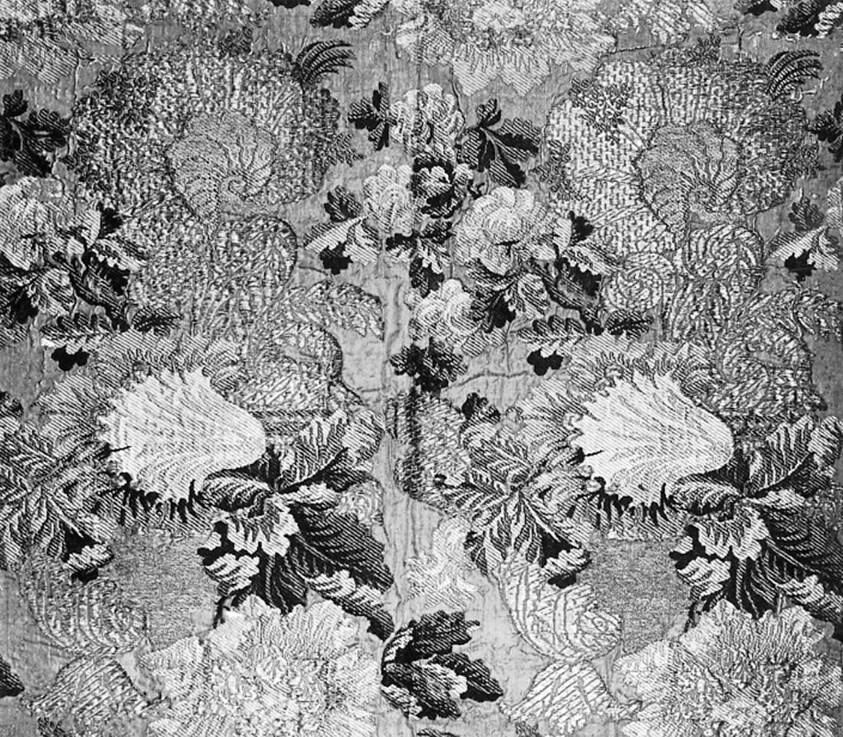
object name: Textile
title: Fragment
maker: France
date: Louis XV period, Mid–18th century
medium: brocaded silk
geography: France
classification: textile; weaving